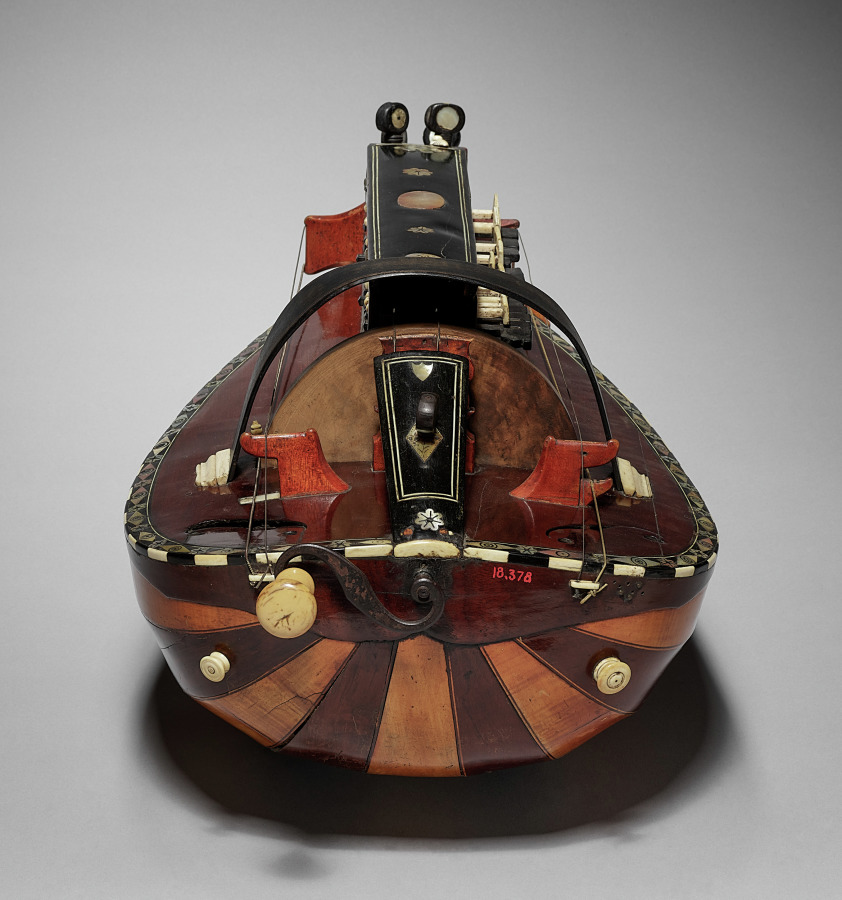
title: Vielle à roue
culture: France, 18th century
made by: Pajot of Jánzat (French)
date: 1700s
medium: wood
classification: Musical Instrument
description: The instrumentalist could play melodies on the keyboard that presses tangents against one or more strings. Often there are also multiple drone strings, which give a constant pitch accompaniment to the melody, resulting in a sound similar to that of bagpipes. This type of instrument is depicted in several artworks in the CMA collection: 1924.656, 2008.34.2, 1960.20. The vielle à roue is also related to the Swedish nyckelharpa, which was featured on the CMA performing arts series in 2017 played by Emilia Amper.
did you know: Also known as a “hurdy-gurdy” or “wheel fiddle,” this instrument produces sound by a hand crank-turned rosined wheel rubbing against the strings.